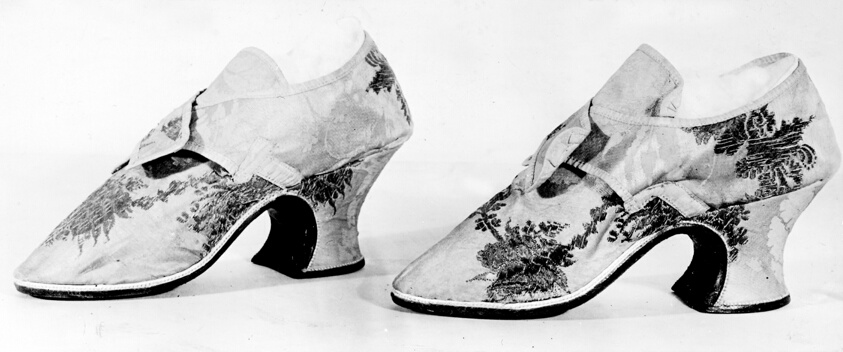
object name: Textile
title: Pair of Shoes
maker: England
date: c.1750s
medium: Leather, silk, damask weave; brocaded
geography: England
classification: textile; shoes - misc; costume accessory - shoe; costume; dress (garment); clothing